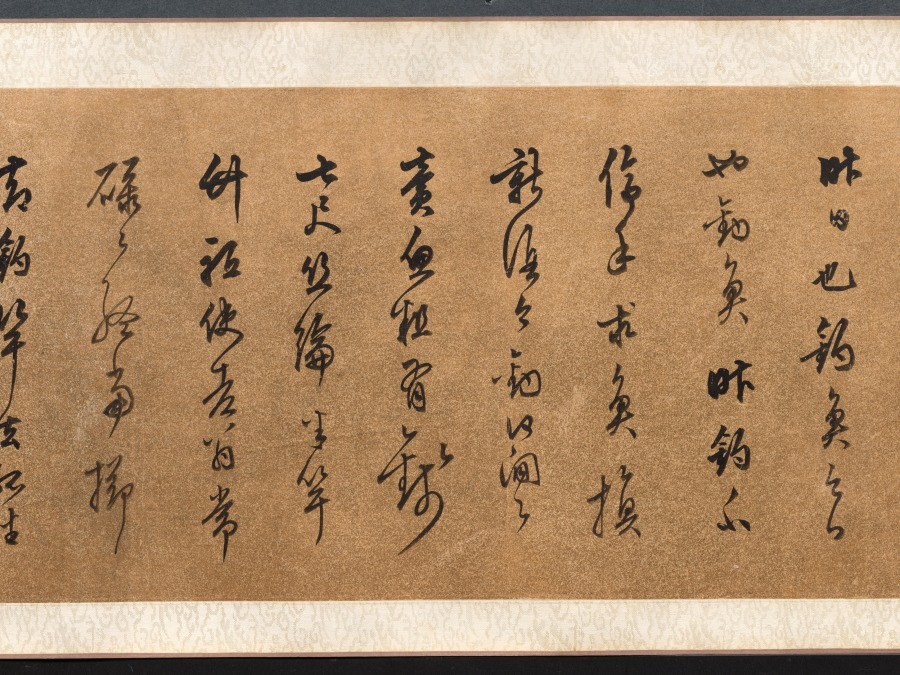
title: Four Poems: Calligraphy in Cursive Script (xingshu)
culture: China, Ming dynasty (1368–1644)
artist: Chen Jiru (Chinese, 1558–1639)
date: 1500s-1600s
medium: handscroll; ink on gold speckled paper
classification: Calligraphy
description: Written in graceful calligraphy with well-composed characters, the artist communicates his thoughts and state of mind in four poems. Characters written in dark, thick strokes convey rhythm, and indicate the moment after the writer had paused to recharge his brush with ink. Chen Jiru was a native of Huating (modern Shanghai). His calligraphy style resembles that of his friend, influential calligrapher Dong Qichang (1555–1636). Unlike Dong, Chen did not pursue government service: he burned his Confucian robes, declined a summons to serve at court, and immersed himself in literature, calligraphy, and painting.